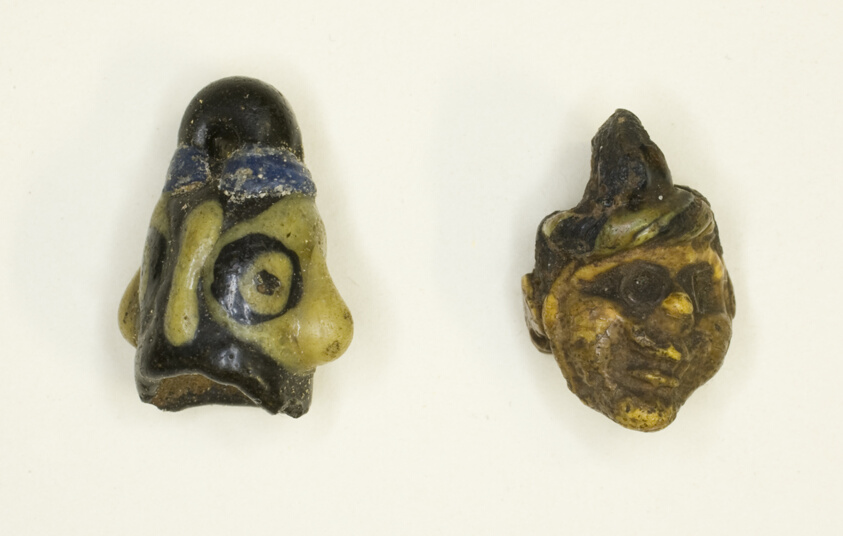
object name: Costume and Accessories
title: Head Pendants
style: roman period (egyptian), greco-roman (egyptian)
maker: Probably Carthaginian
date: Roman Period (30 BCE–395 CE)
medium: Glass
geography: Carthage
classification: stone; jewelry; amulet; ancient art; costume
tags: head